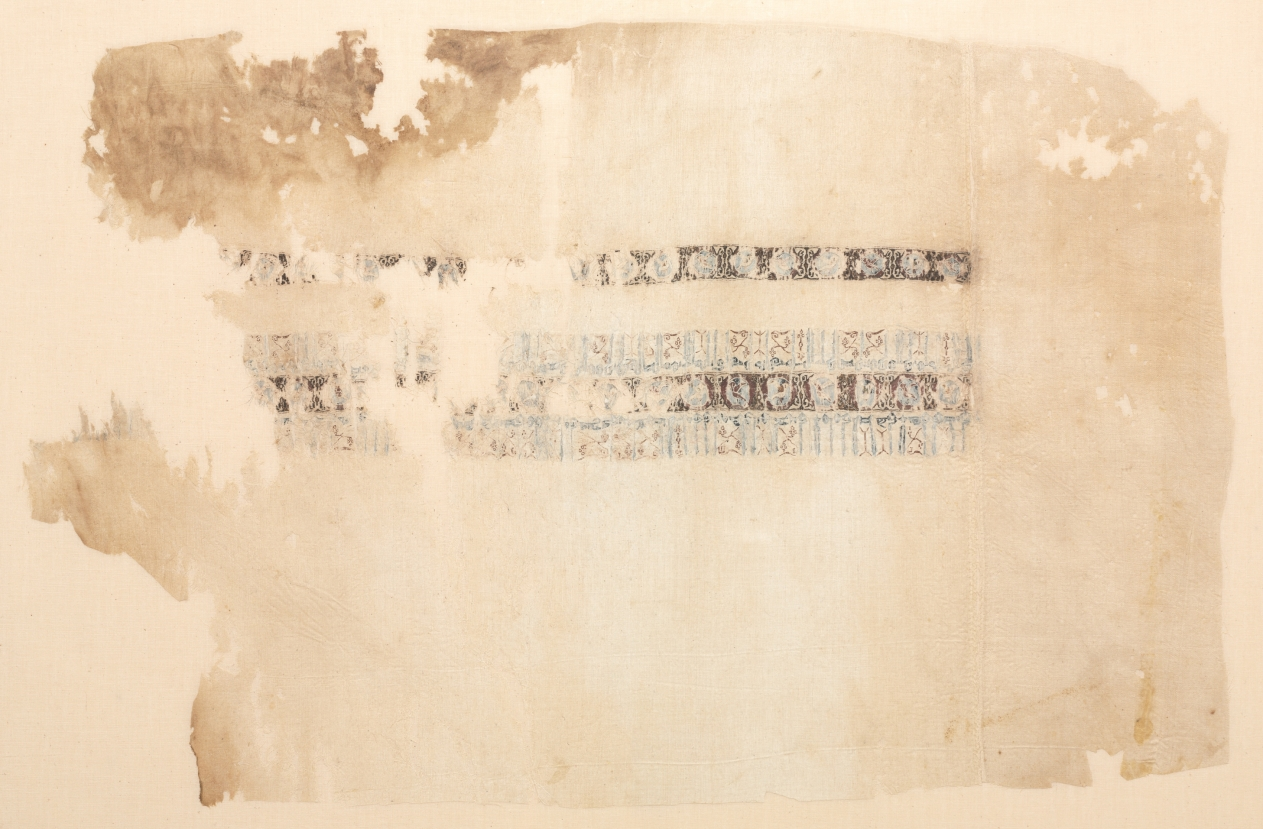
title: Fragment of a Tiraz, Probably Inset from a Sleeve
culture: Egypt, Fatimid period, Caliphate of al-Zahir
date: 1027–36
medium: tabby ground with inwoven tapestry ornament; linen and silk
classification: Textile